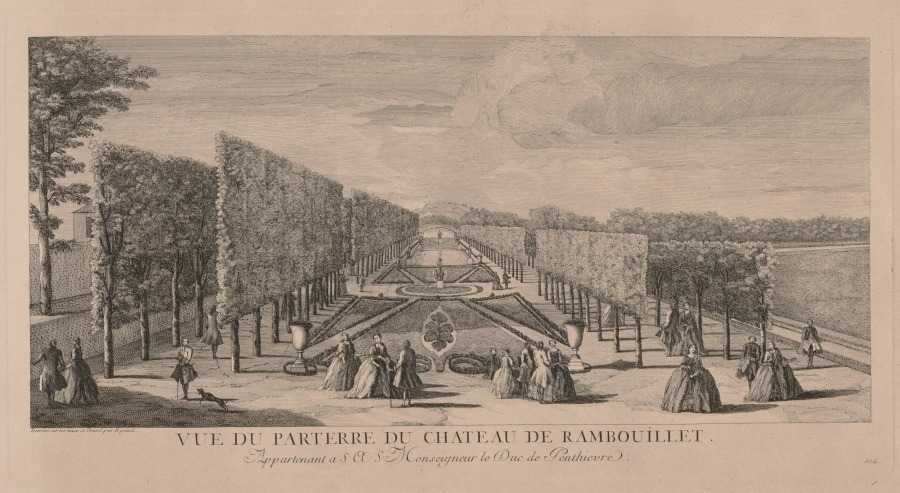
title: Flower Garden of Chateau Rambouillet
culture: France, 18th century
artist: Jacques Rigaud (French, 1681–1754)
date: c. 1720–50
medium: engraving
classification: Print